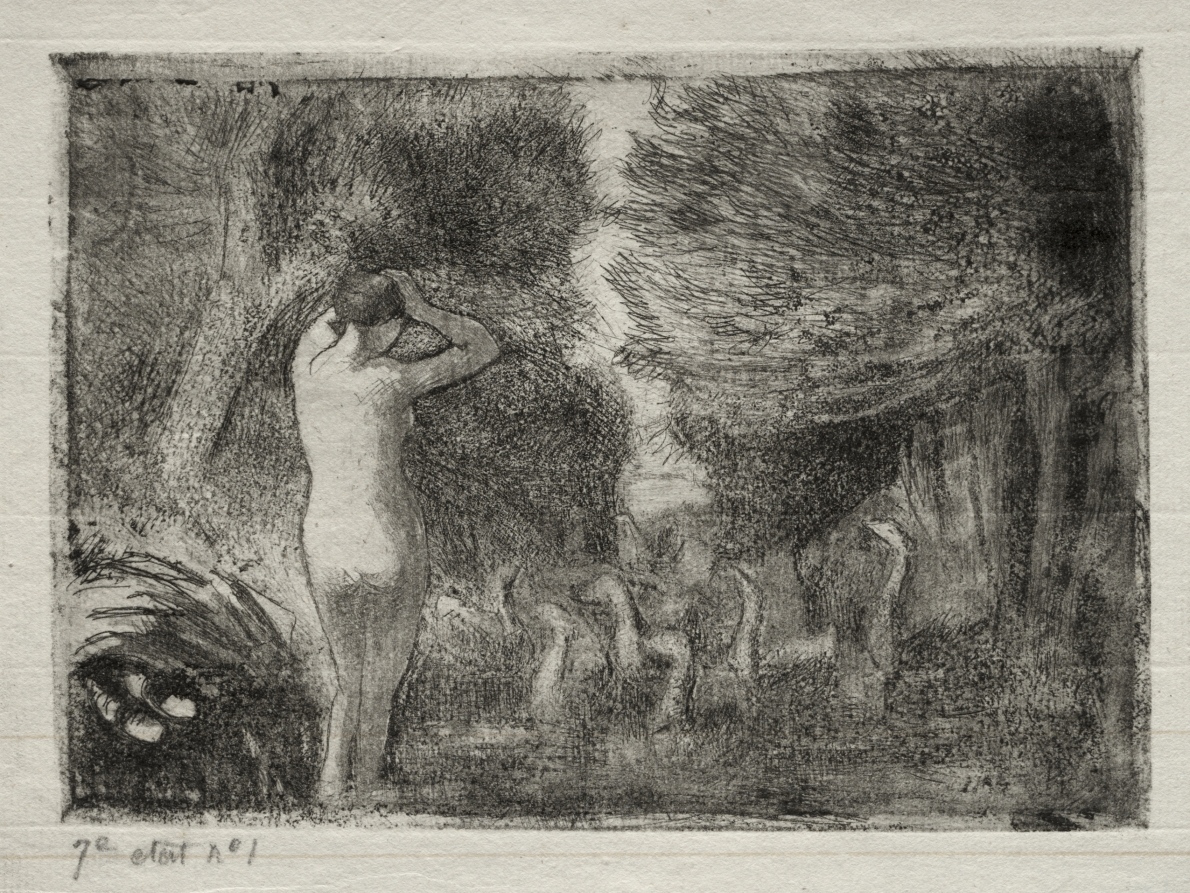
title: Bather and Geese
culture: America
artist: Camille Pissarro (French, 1830–1903)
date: 1895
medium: etching and aquatint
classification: Print